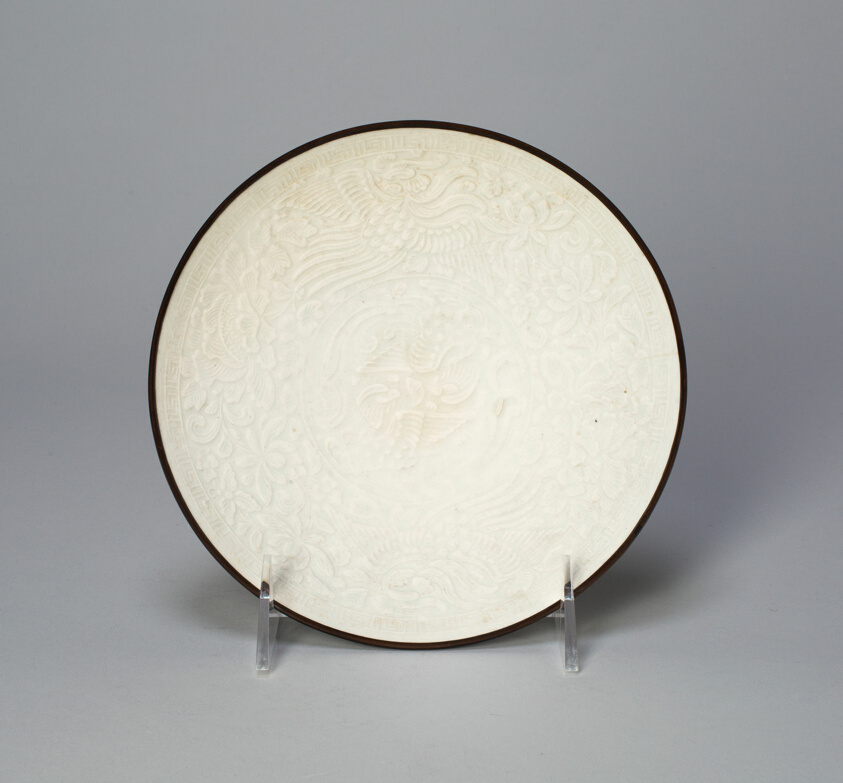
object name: Vessel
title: Dish with Peonies and Phoenixes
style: Chinese (culture or style)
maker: China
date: Song dynasty (960–1279)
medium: Qingbai ware; porcelain with underglaze molded decoration; copper rim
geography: China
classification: dish (vessel); asian art; ceramics; vessel